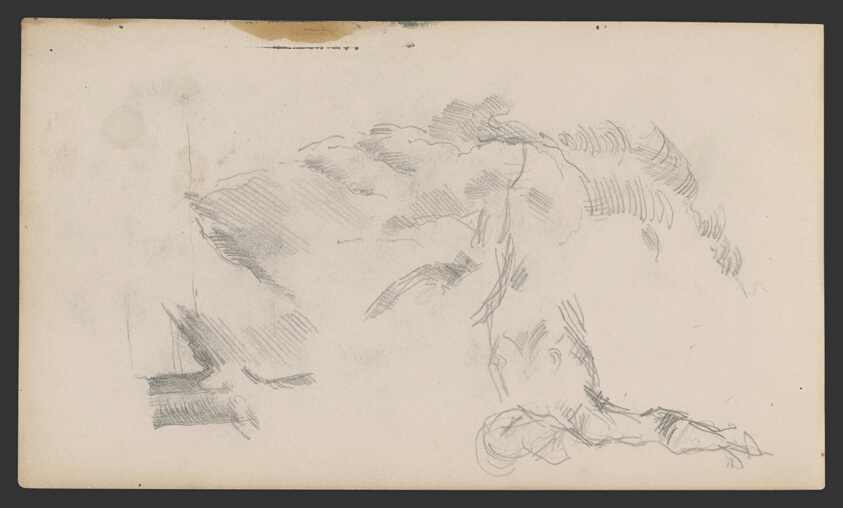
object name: Drawing and Watercolor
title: Sketchbook No. 2 (L'Estaque)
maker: Paul Cézanne; French, 1839-1906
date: 1875–86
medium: Graphite and pen and ink drawings on paper, bound into a book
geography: France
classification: sketchbook; graphite; prints and drawing; paper